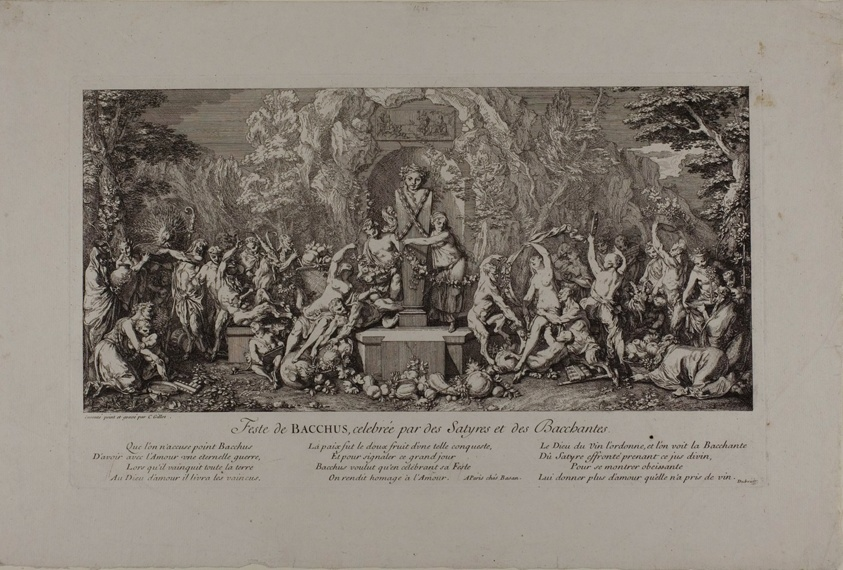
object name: Print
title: Festival of Bacchus Celebrated by Satyrs and Bacchantes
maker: Claude Gillot (French, 1673-1722)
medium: Etching on paper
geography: France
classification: etching; print; prints and drawing